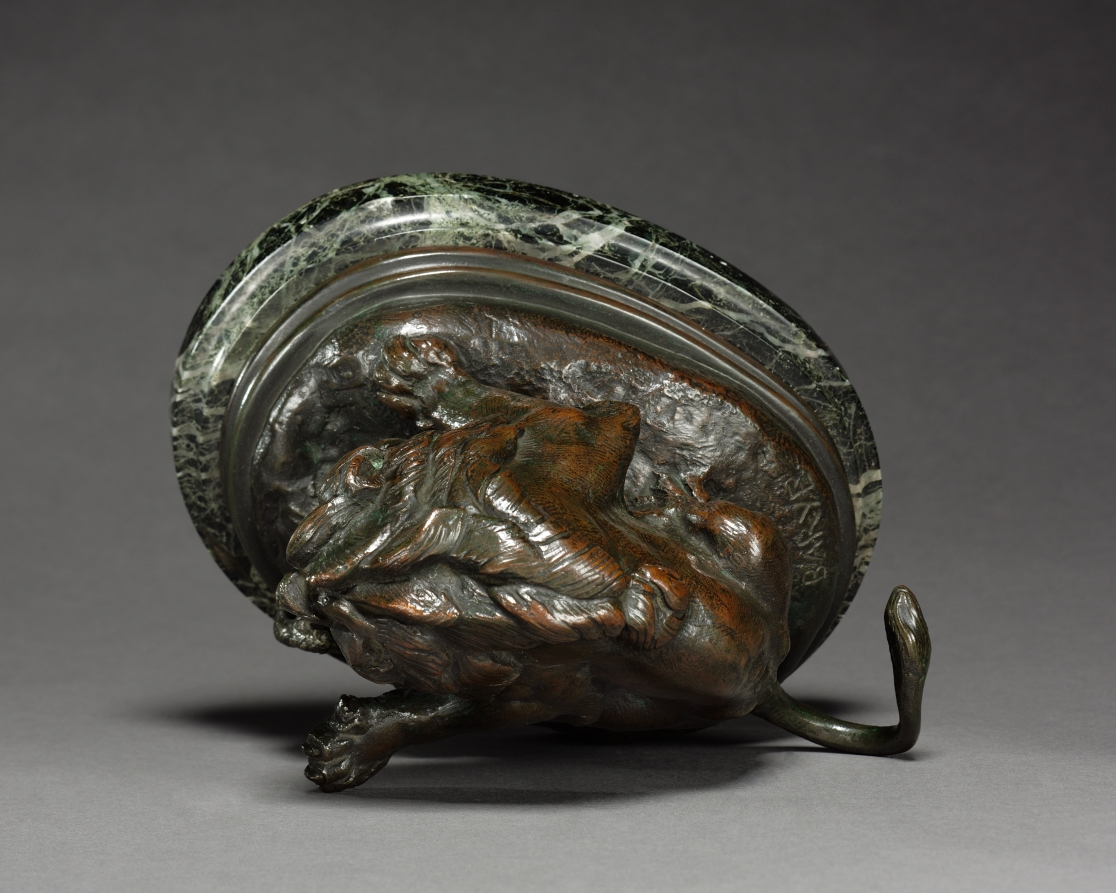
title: Lion and Serpent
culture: France, 19th century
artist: Antoine-Louis Barye (French, 1796–1875)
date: c. 1830 – 1875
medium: bronze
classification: Sculpture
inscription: Signed: "Barye"